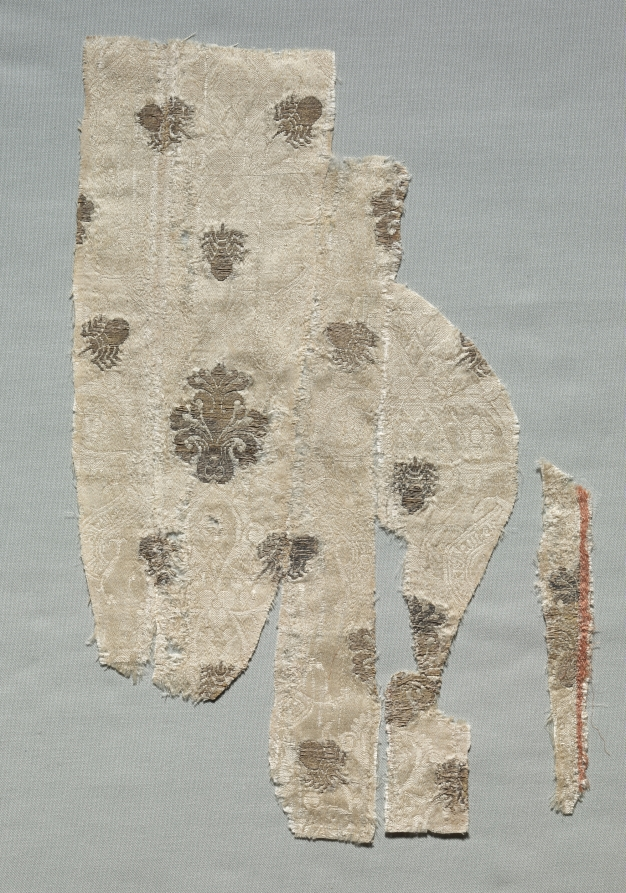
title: Silk Fragment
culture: Italy, second half of 14th century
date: 1350–1399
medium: lampas weave, brocaded; silk and Cyprian gold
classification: Textile